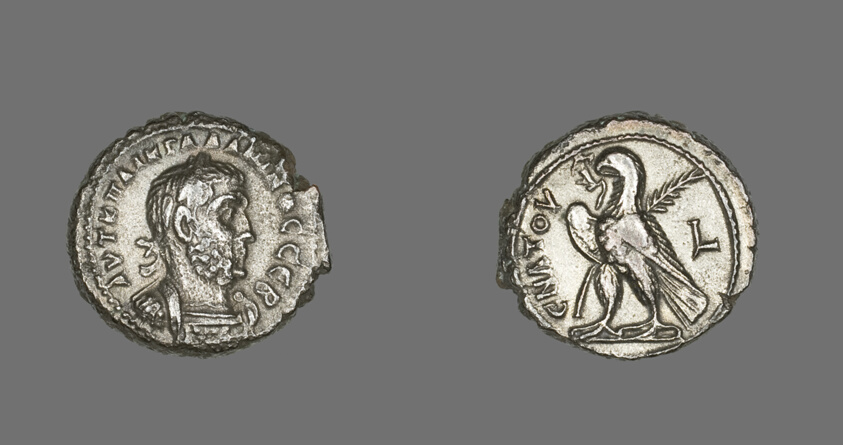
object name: Coin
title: Tetradrachm (Coin) Portraying Emperor Gallienus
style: roman period (egyptian), greco-roman (egyptian)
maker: Roman, minted in Alexandria, Egypt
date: 261-262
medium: Billon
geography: Egypt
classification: coin; ancient art